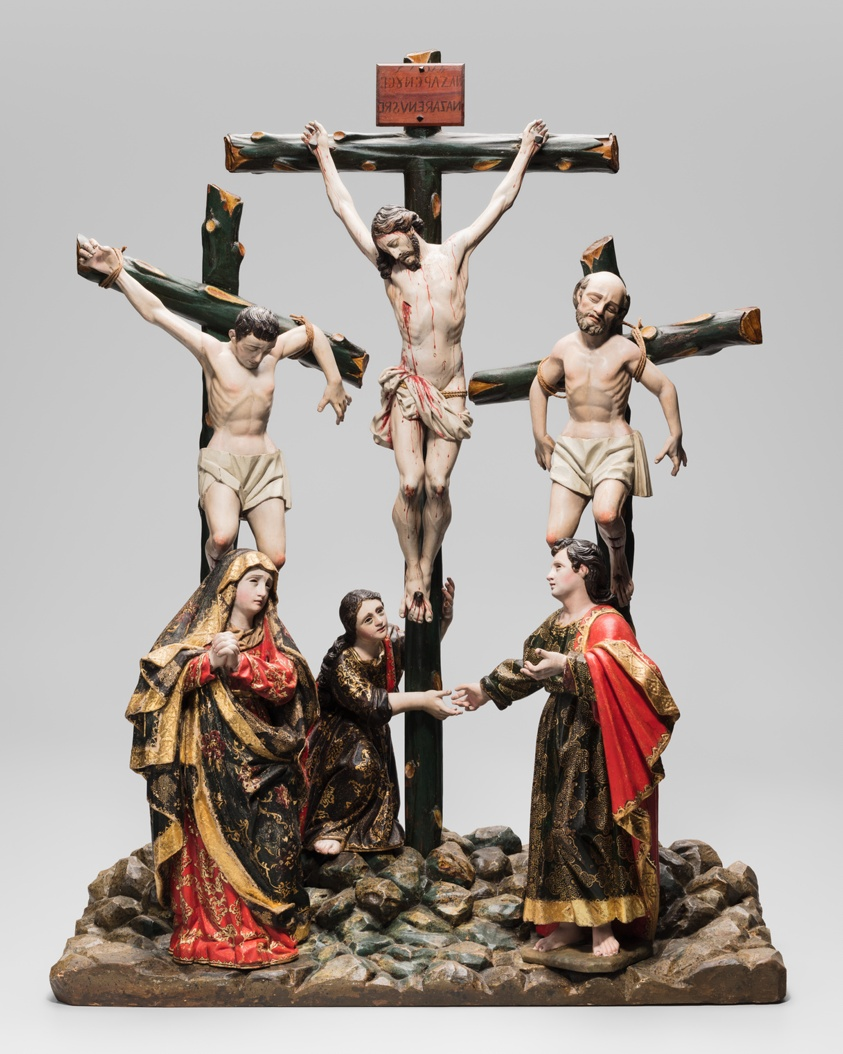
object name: Sculpture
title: Calvary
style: south american, 18th Century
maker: Guatemalan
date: c. 1765–1800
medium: Polychromed wood with gilding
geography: Guatemala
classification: altarpiece; sculpture/wood; sculpture; wood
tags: calvary, religion, altar, crucifixions, Saint John the Baptist, saints, Christian subjects, Christianity, cross, Jesus, Mary Magdalene, men, religious, religious figures, religious scenes, Virgin Mary, woman, women